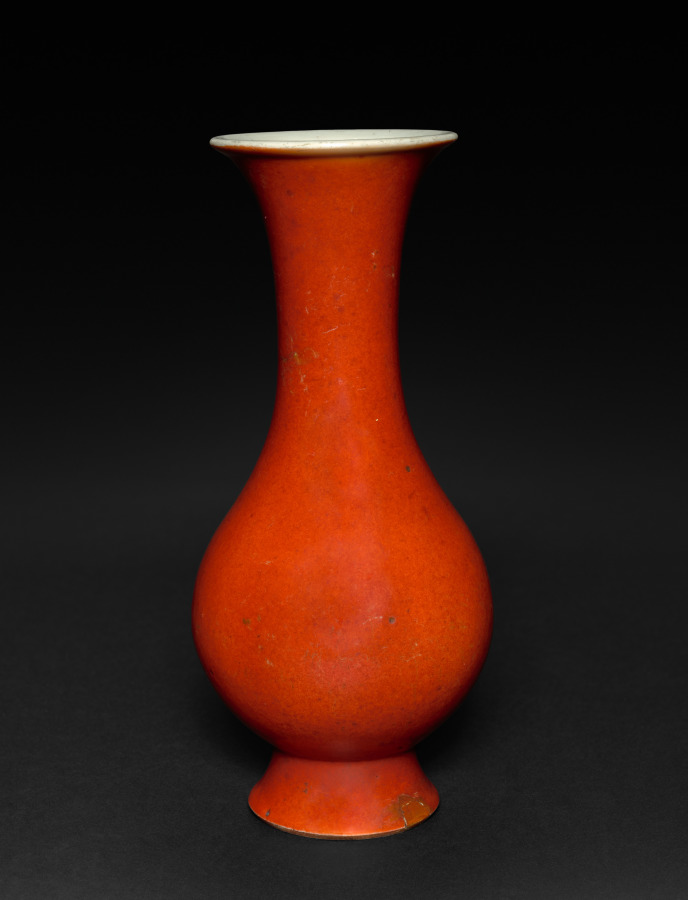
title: Vase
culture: China, Jiangxi Province, Jingdezhen kilns, Qing dynasty (1644–1911), Yongzheng reign (1722–35)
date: 1723–35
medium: porcelain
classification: Ceramic